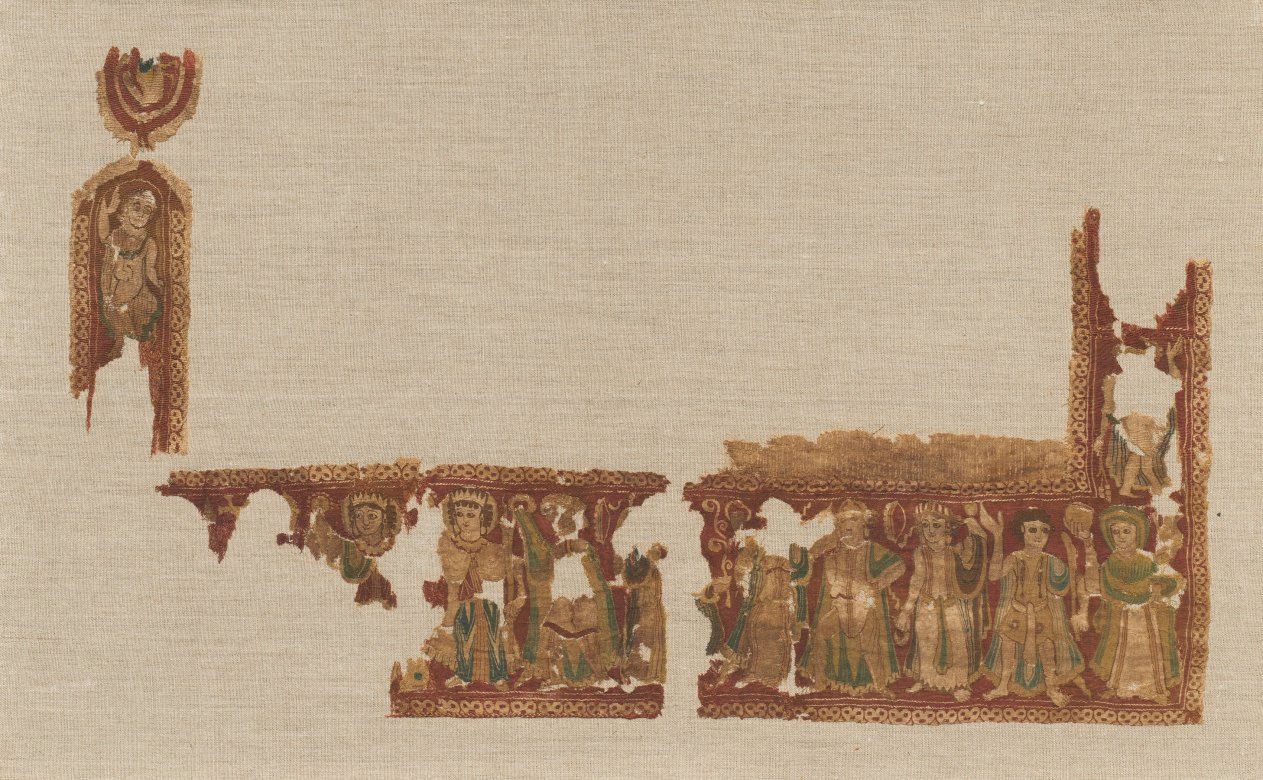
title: Part of a Gammadion Border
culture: Syria(?)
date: 400s–500s CE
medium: wool and linen: tapestry weave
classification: Textile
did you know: This fragment is ornamented with a frieze of figures.